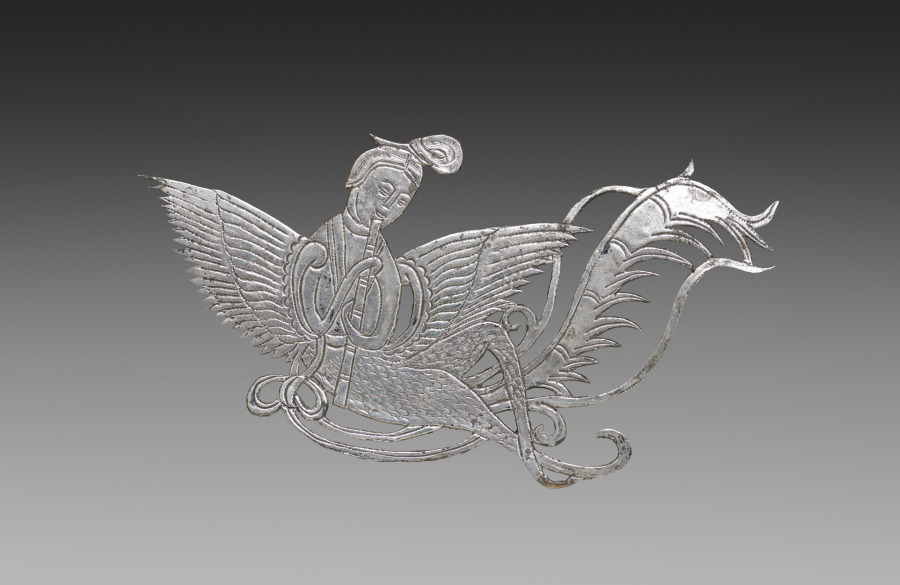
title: Inlay for a Mirror or Box: Lady and Flute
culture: China, Tang dynasty (618-907) - Song dynasty (960-1279)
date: c. 900–1000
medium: beaten silver with chased details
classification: Metalwork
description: The p'ing-t'o technique of inlaying gold and silver foil on lacquer produced luxurious articles of elegance and fragility. These stray silver inlays were originally mounted on a mirror back or a cosmetic box whose lacquered surface has disintegrated. They combine auspicious symbols of Indian and Chinese origin--human-headed birds whose melodies filled the Buddhist paradise, and bird-riding deities who inhabited the skies of Taoist mythology. Like these imaginary beings, the lions were probably paired in a radial design; at least one has been lost.